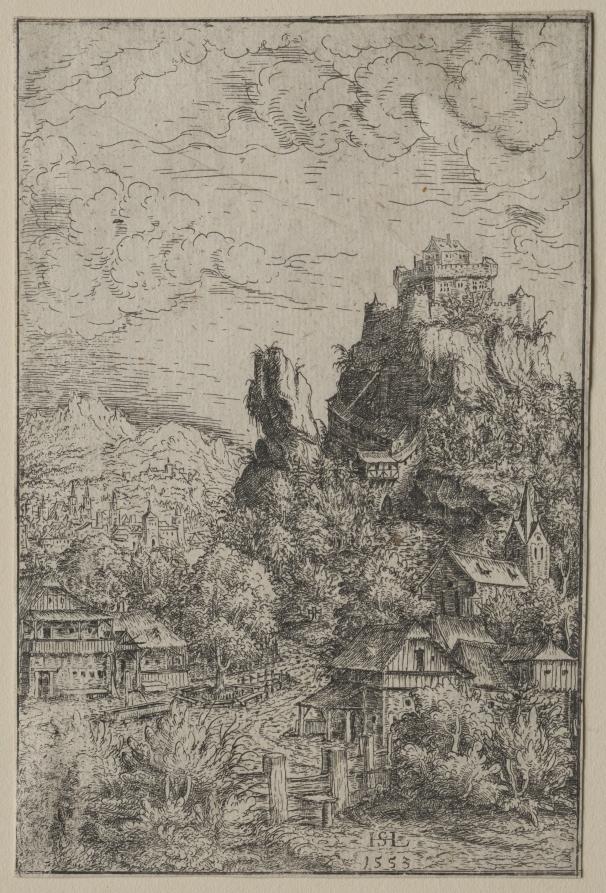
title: Landscape with a Castle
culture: Germany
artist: Hanns Lautensack (German, 1524–1566)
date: 1553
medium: etching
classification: Print